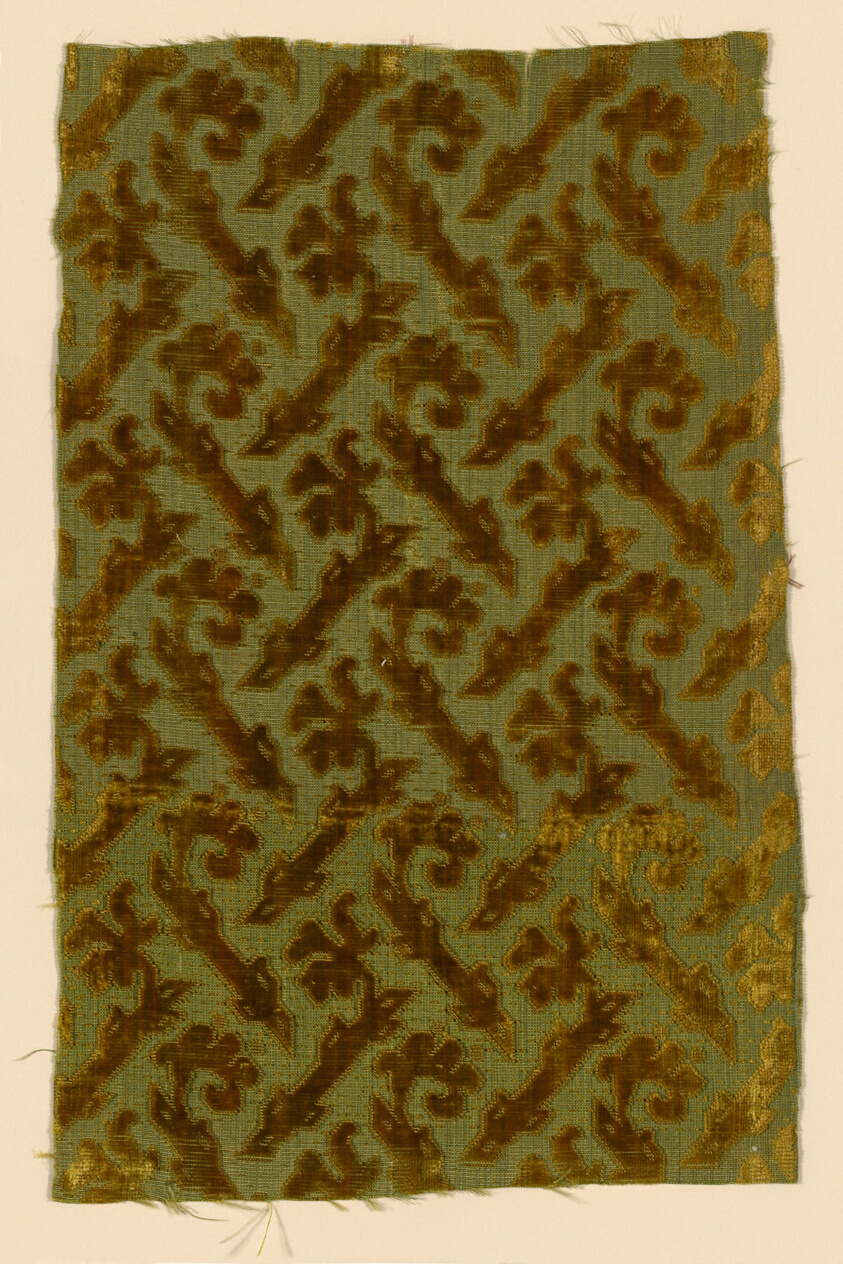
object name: Textile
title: Fragment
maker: Italy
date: 1600/50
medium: cisele voided cloth velvet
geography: Italy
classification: textile; weaving - velvet